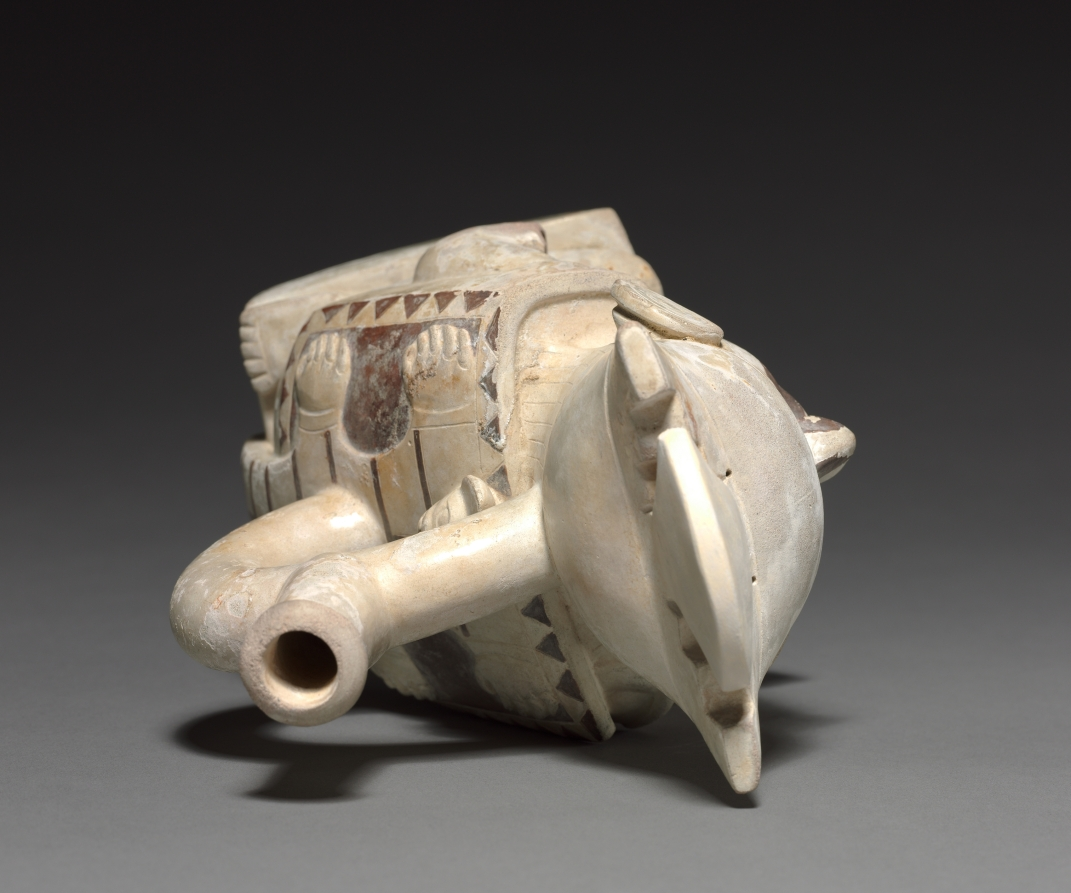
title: Warrior Vessel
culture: Peru, North Coast, Moche, Moche style (50-800)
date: c. 50–200 CE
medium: earthenware with colored slips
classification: Ceramic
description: This vessel's exquisite, crisp detail rewards careful viewing. The modeling of the feline pelt on the back is especially delicate and sharp, and each of the squares on the tunic carries a tiny dot in the upper corners, as though the squares represent plates of metal or shell attached to fabric. The face is decorated with paint or tattooing, and the headdress supports a curved, blade-shaped form.